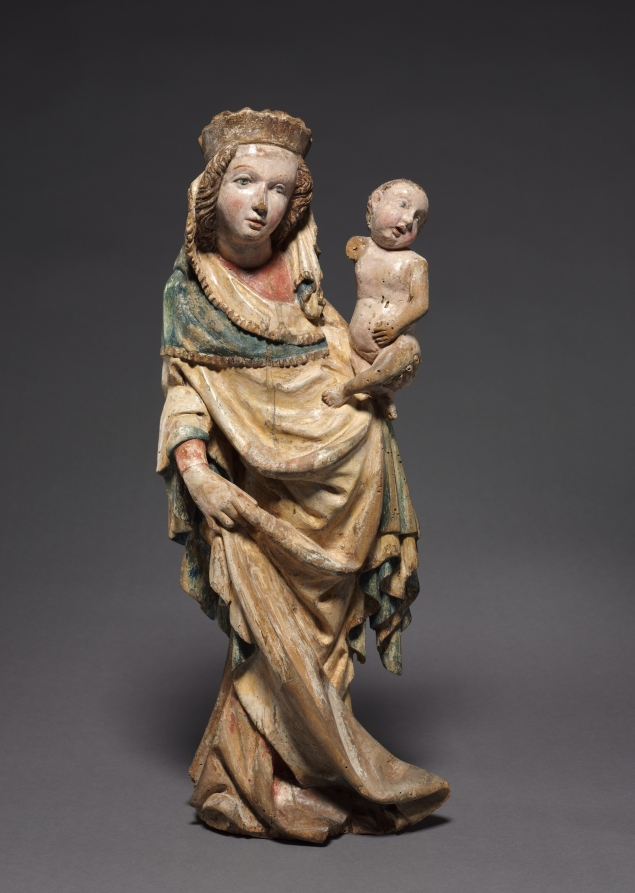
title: Madonna and Child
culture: Bohemia, vicinity of Freistadt, 15th century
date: c. 1400–1410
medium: lindenwood with polychromy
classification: Sculpture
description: This sculpture belongs to a type known as a Schöne Madonna or "Beautiful Virgin," popularized in central Europe during the late 1300s and early 1400s. The Virgin’s stance adheres to an S-curve as she stands with one leg straight and the other slightly bent at the knee. Her body is hidden beneath long, voluminous, draping garments. These so-called Beautiful Madonnas are among the most popular creations of Bohemian art and were in high demand for churches and private veneration.